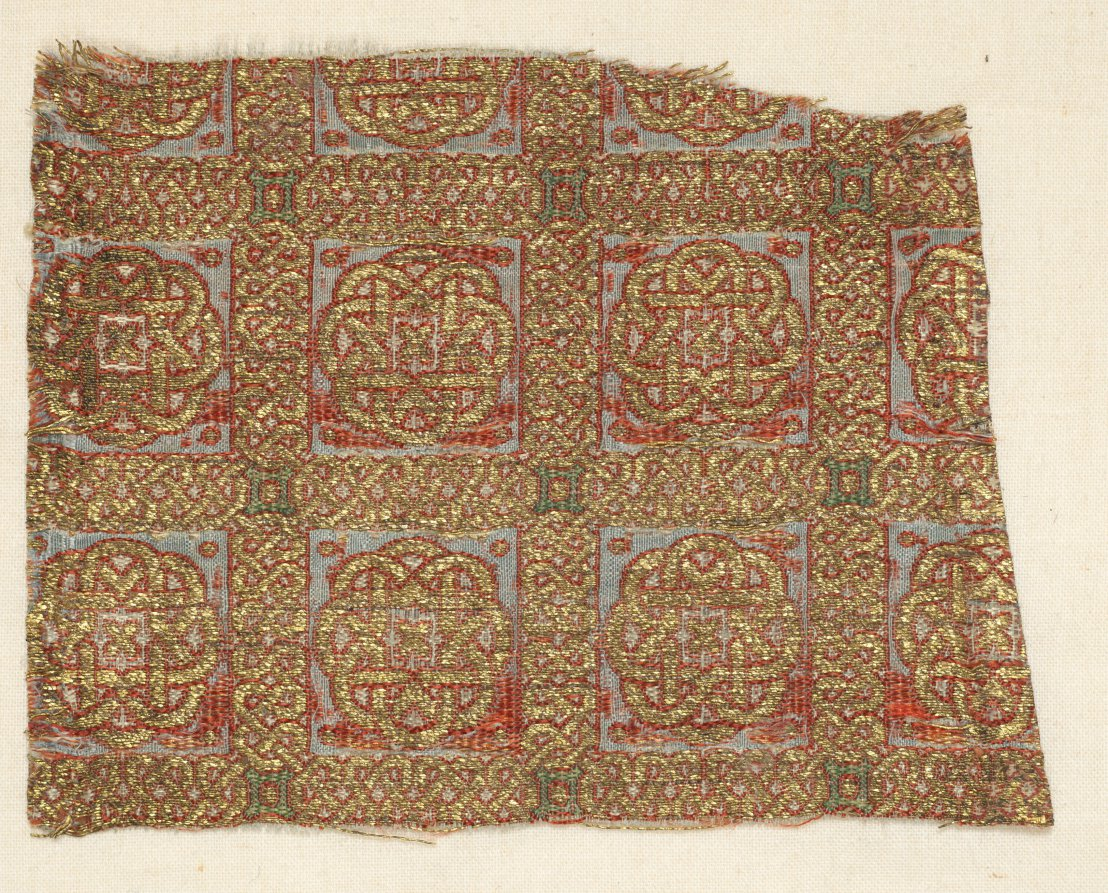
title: Fragment with stars in stacked squares, from a dalmatic of San Valero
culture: Spain, probably Almeria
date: 1200s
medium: lampas with areas of double cloth: silk and gold thread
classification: Textile